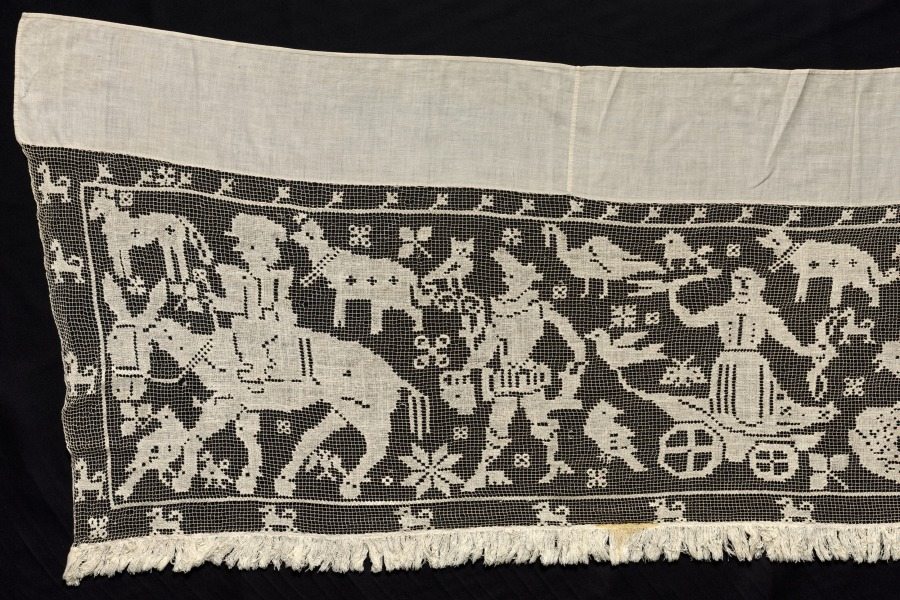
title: Border with Mounted and Standing Figures, Chariots, and Animals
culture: Spain ?, 1800s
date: 1800s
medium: Bleached linen (est.): needle lace, filet/lacis (knotted ground and darned in two directions)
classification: Lace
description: Animals viewed in profile, some with their legs raised, indicate movement, such as a parade or procession. The human figures are also shown in profile, with the exception of the central figure riding a chariot, who is shown frontally. There is one figure riding a donkey, with another on horseback, holding a sword. On the far right, a man and woman appear engaged in conversation. Meanwhile, various animals fill the space defying all rules of perspective, with the bird in the center appearing larger than some of the humans.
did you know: The word lace derives from the Latin laqueus, meaning noose.